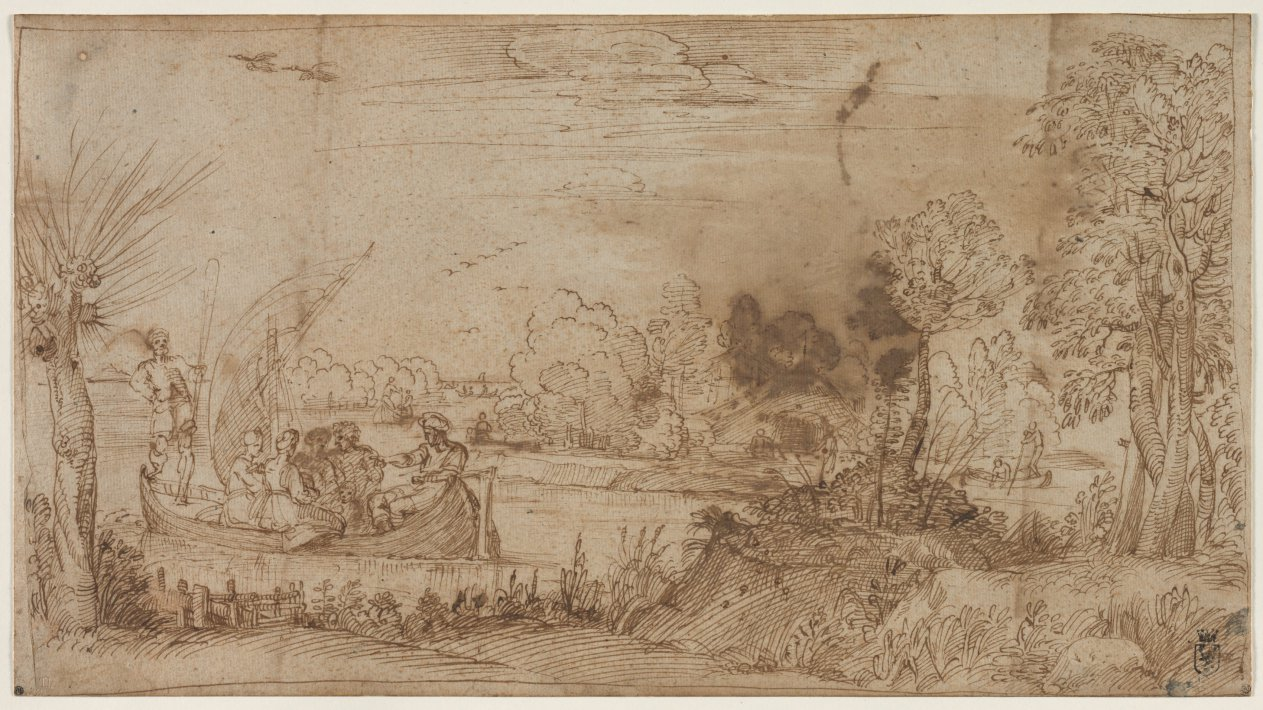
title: River Landscape with Boats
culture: Italy, 16th century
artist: Annibale Carracci (Italian, c. 1560–1609)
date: c. 1590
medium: pen and brown ink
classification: Drawing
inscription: SECONDARY SUPPORT (now removed), in black ink: 77 [crossed out]. 91 Agostino Carracci . A Landscape with a river & boats one full of company [last four words inserted] : executed with a pen. Size 8"3/4 x 16"3/4 [crossed out] / From the Collections of M. Mariette & Sir Thomas Lawrence .